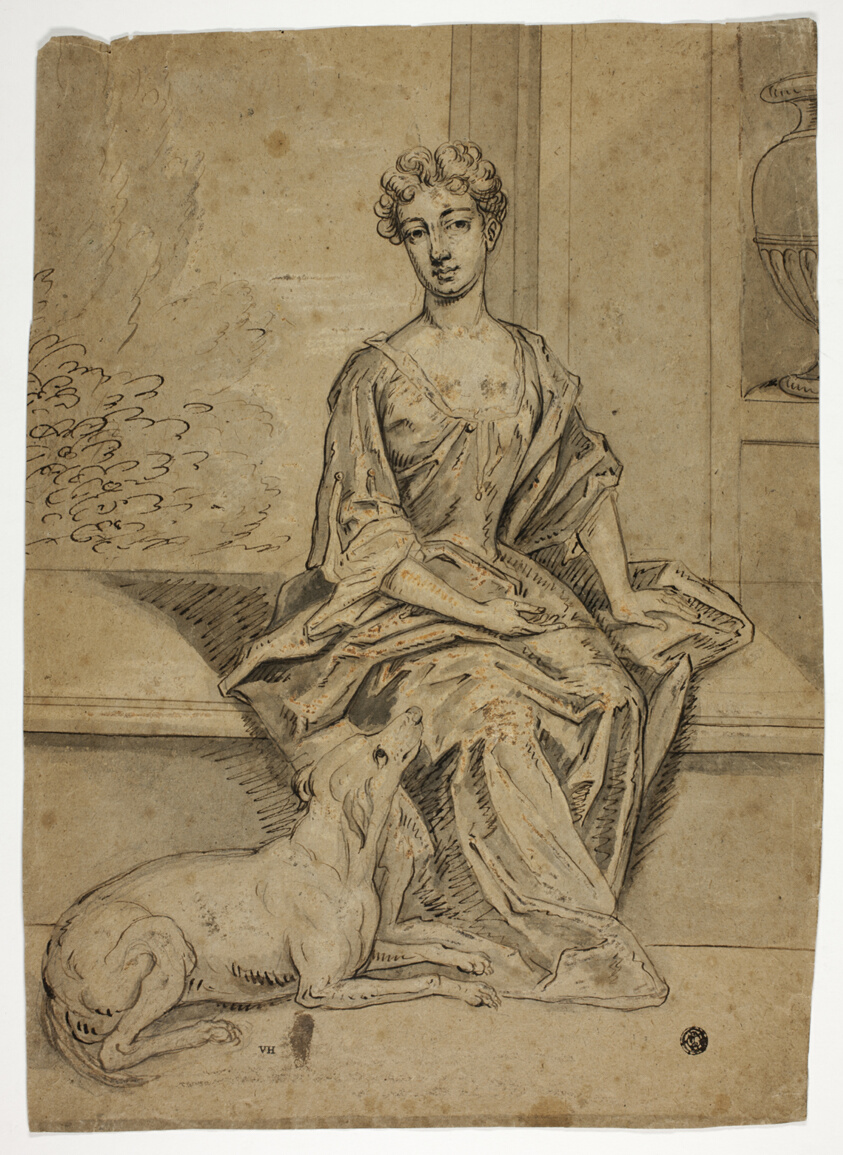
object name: Drawing and Watercolor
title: Portrait of Court Lady with Mastiff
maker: Godfrey Kneller or possibly after; English, b. Germany, 1646-1723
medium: Pen and brown ink, and brush and gray wash, hieghtened with lead white (discolored), over graphite, on pale brown laid paper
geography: England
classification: pen and ink drawings; drawings (visual works); prints and drawing